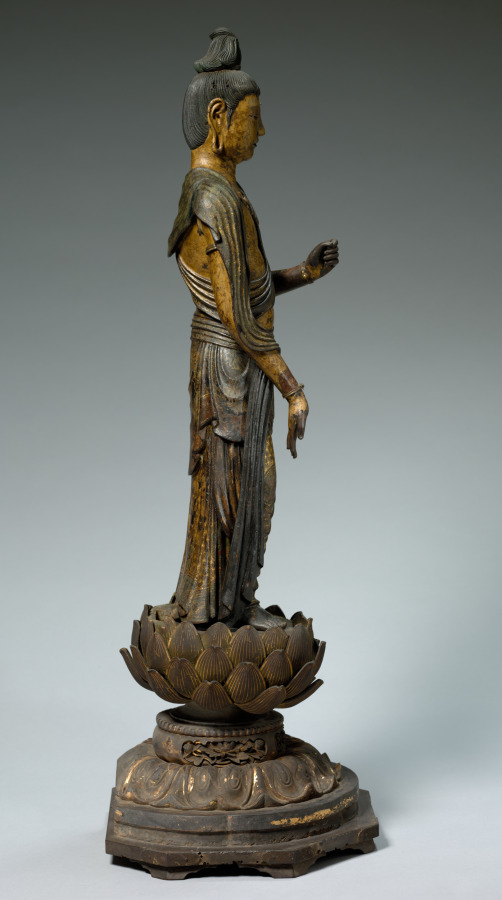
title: Bodhisattva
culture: Japan, Kamakura period (1185–1333)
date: c. 1200–1250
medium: lacquered wood with color, gilt copper, and cut-gold (kirikane)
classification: Sculpture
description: This sculpture represents one of two bodhisattvas who flank the Buddha Amida, the Buddha of Infinite Life and Light. He has one foot in front of the other and his right leg bent at the knee to show that he is in motion; his torso also sways. He accompanies Amida as he descends to collect a dying person who has asked to be born after death into Amida’s Pure Land, a place conducive to progressing along the path to enlightenment.